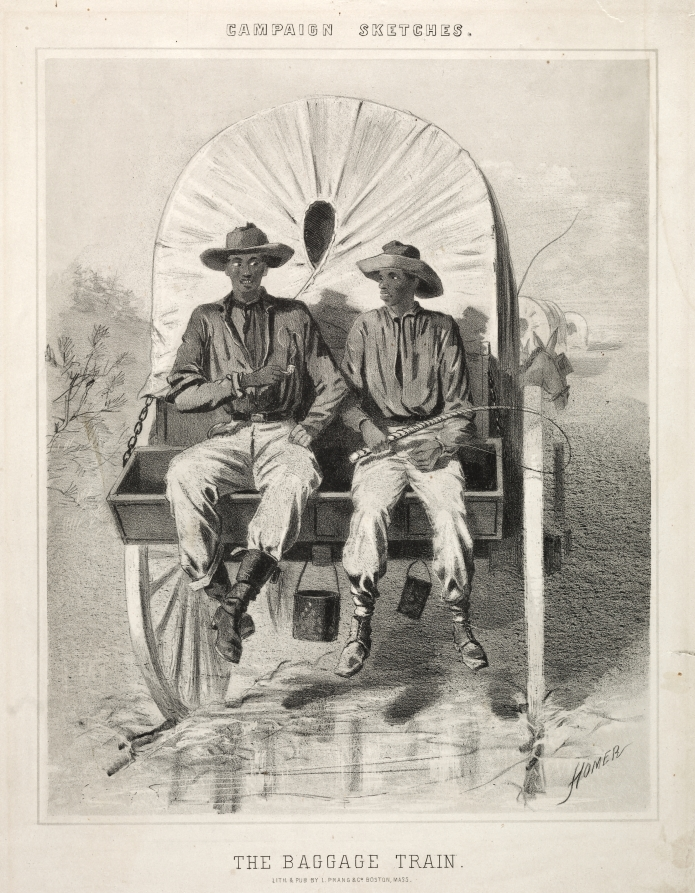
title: Campaign Sketches: The Baggage Train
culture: America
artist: Winslow Homer (American, 1836–1910)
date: 1863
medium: lithograph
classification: Print